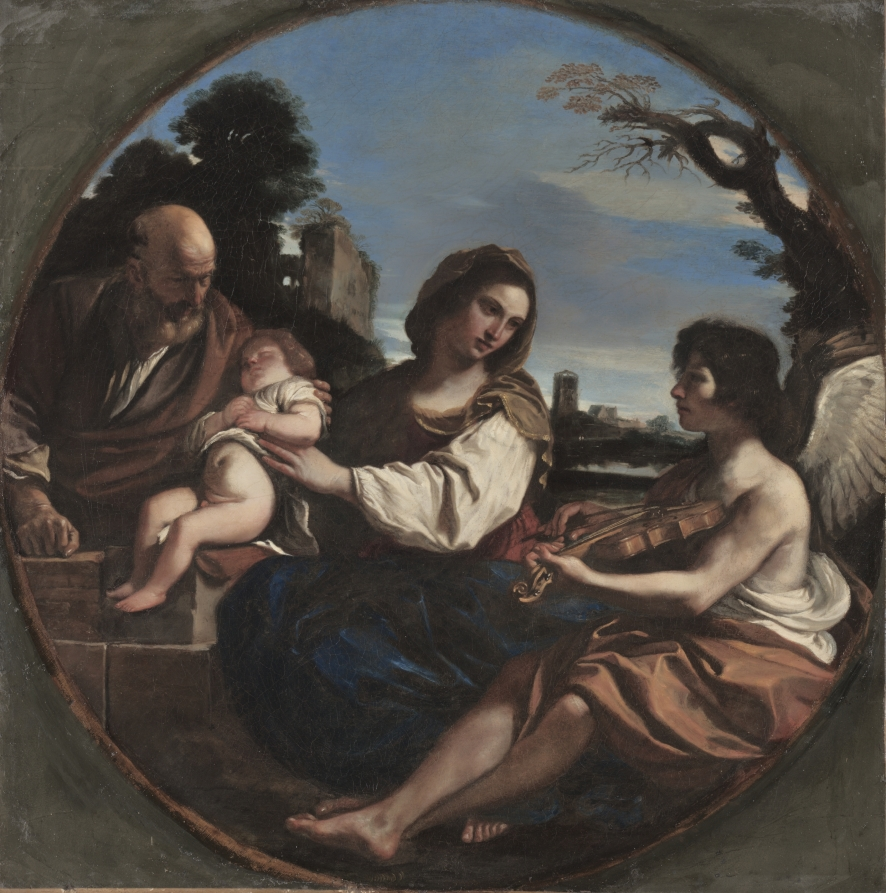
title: Rest on the Flight into Egypt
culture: Italy, 17th century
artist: Guercino (Italian, 1591–1666)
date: 1624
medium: oil on canvas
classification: Painting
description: Giovanni Francesco Barbieri (called il Guercino) created Rest on the Flight to Egypt as a tondo, a circular canvas rarely used in the sixteenth and seventeenth centuries except in the case of holy subjects. The round shape represents the circle, symbolic for the nature of God, believed to have no end and no beginning. The painting depicts Mary the Mother of God, the Infant Christ, St. Joseph, and a musical angel, serenading the Holy Family during their exhausting journey through Egypt. Guercino, "the squint-eyed", was born near Bologna and became an influential painter in Rome in the early seventeenth century, where he created important commissions. His style was an important mix of the strong use of tenebrism, introduced by Caravaggio, and artists of the classical baroque, such as Domenichino, Annibale Carracci, and Guido Reni. The composition is clearly composed with strongly modeled forms and a cool harmony of colors. The sleeping Infant Christ is lulled to sleep by the angel's violin and the ideal landscape with classical ruins adds to the calm serenity of this painting.